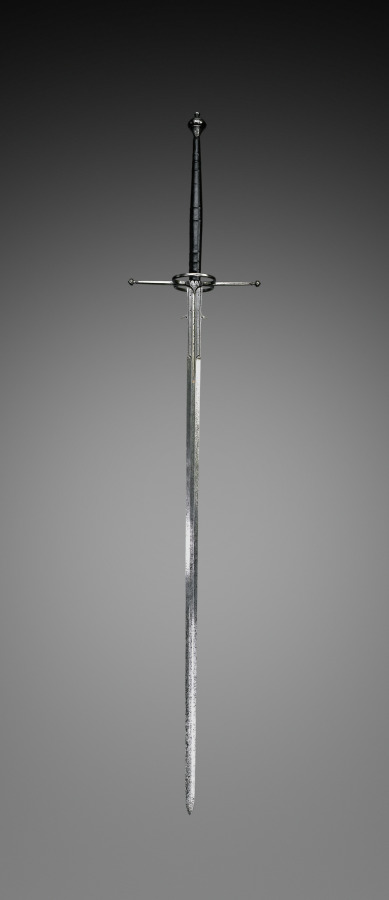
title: Two-Handed Sword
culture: Spain, Toledo (?), second half of 16th Century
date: 1550–1600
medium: steel, wood and leather grip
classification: Arms and Armor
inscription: IVLIAN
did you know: This Spanish sword is meant to be brandished with two hands, used by a combatant on foot rather than on horseback. Imagine the weight of this sword in your hands.